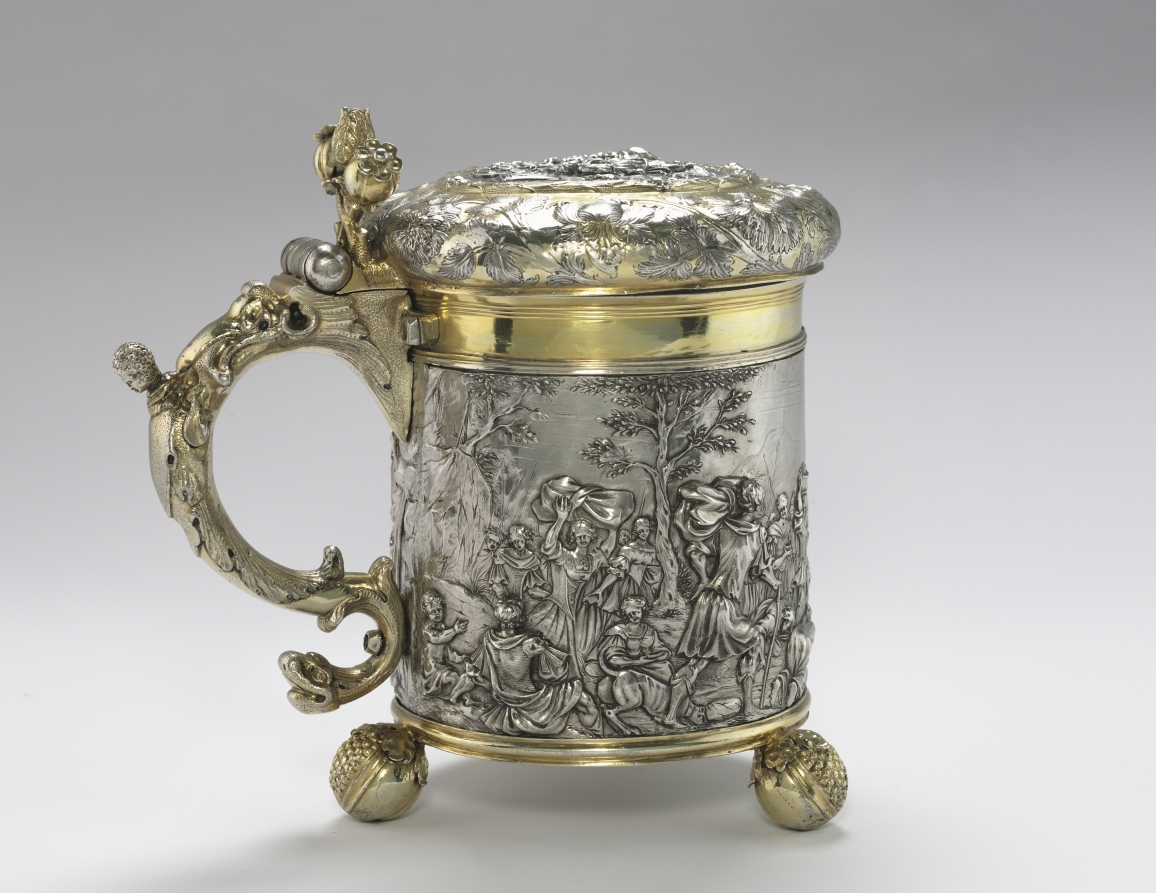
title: Tankard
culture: Germany, Augsburg, 17th century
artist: Andreas Brachfeldt (Russian, born Latvia, active 1661–1697)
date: c. 1680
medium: cut and seamed silver sheet, repoussé and chased ornament, cast handle and feet, partially gilded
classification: Metalwork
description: Tankards of this form were made toward the end of the 1600s in various port cities rimming the Baltic Sea. This example is enriched with a detailed scene of Moses striking the rock, executed in Augsburg, Germany, in about 1675–78.